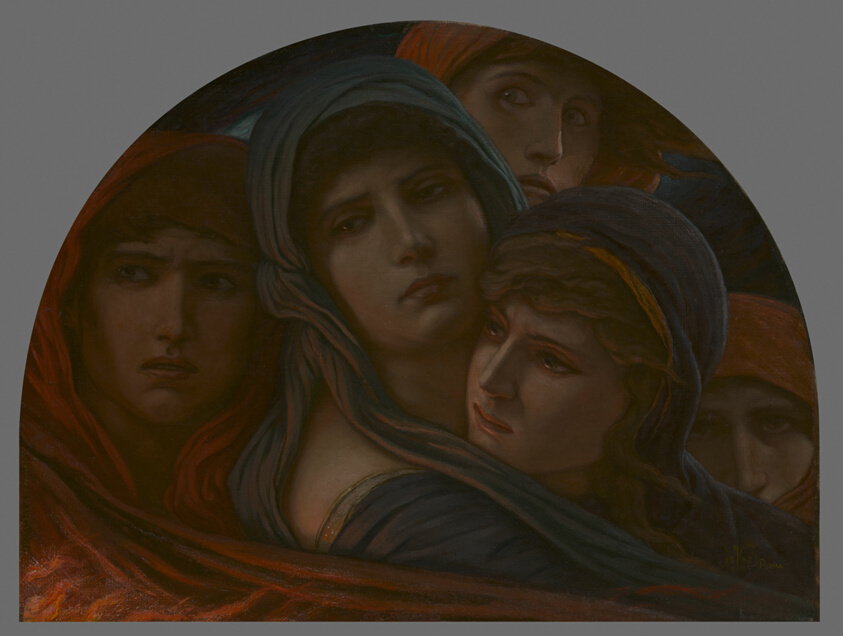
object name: Painting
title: A Glimpse into Hell, or Fear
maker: Elihu Vedder (American, 1836–1923)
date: 1888–98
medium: Oil on canvas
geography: Rome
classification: painting; american arts